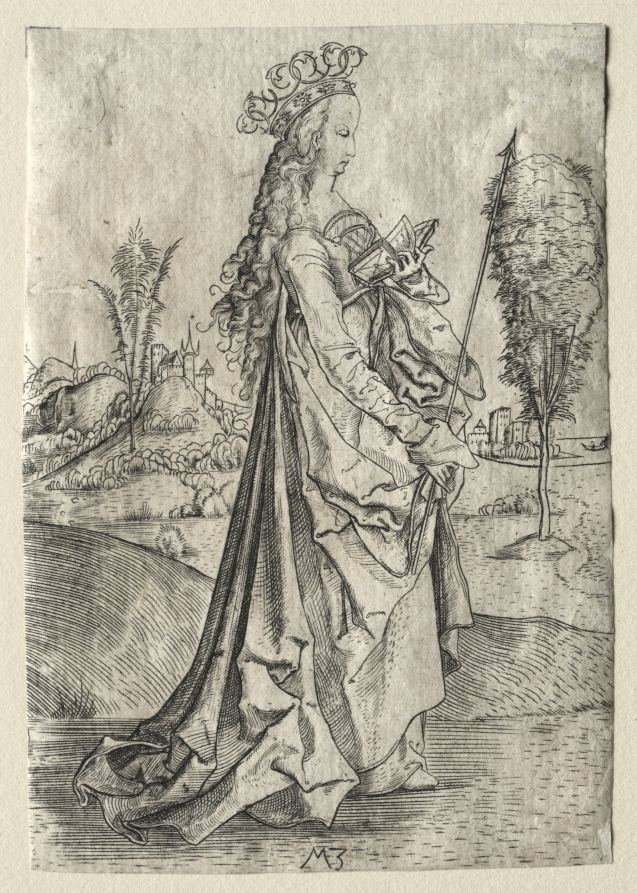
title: St. Ursula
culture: Germany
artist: Master MZ (German)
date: 1500–03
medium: engraving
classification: Print